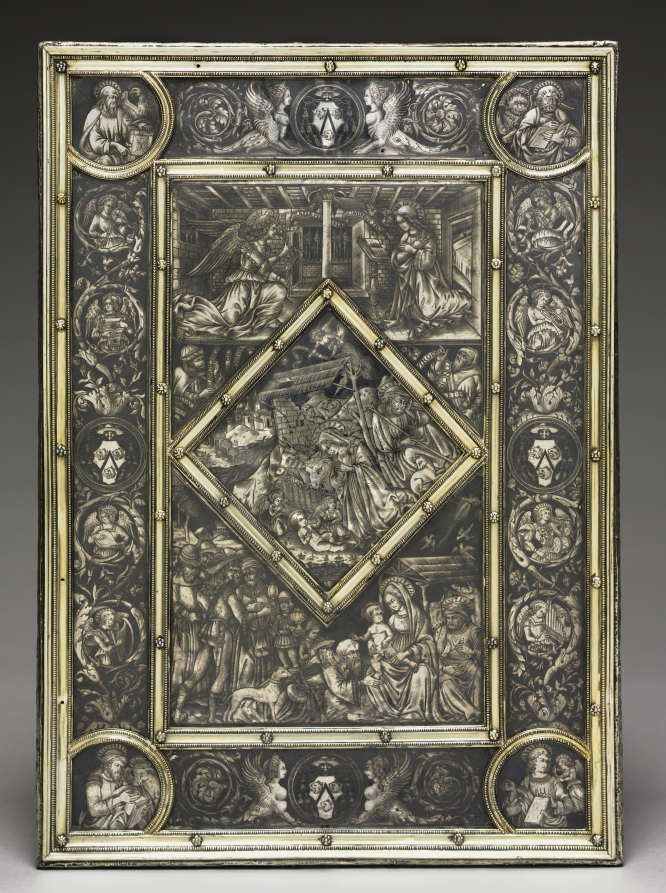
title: Front Cover for a Gospel Book of French Cardinal Jean La Balou (1421-1491)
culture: Italy, Florence, 15th century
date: c. 1467–68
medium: nielloed silver plaques within gilt-silver borders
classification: Metalwork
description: Scenes from Christ’s infancy decorate this cover that once adorned the front of a gospel book. It is made up of a series of silver plaques held together by gilt-silver borders. The plaques are engraved, and the resulting fine lines or depressions have been filled with a silver sulfide alloy, lustrous black in color, in a technique called niello. It is one of the finest examples of this decorative technique for which Florence was renowned in the 15th century. This cover and its manuscript once belonged to the French cardinal, Jean La Balou, who was jailed in 1469. He presented his gospel book to Pope Paul II as a gift, perhaps in the hope of receiving his freedom. The gospel book, of which its two covers have survived (the back cover is in the Minneapolis Institute of Arts), remained in the papal apartments until the end of the 18th century, perhaps leaving when Napoleon’s troops held the Vatican.